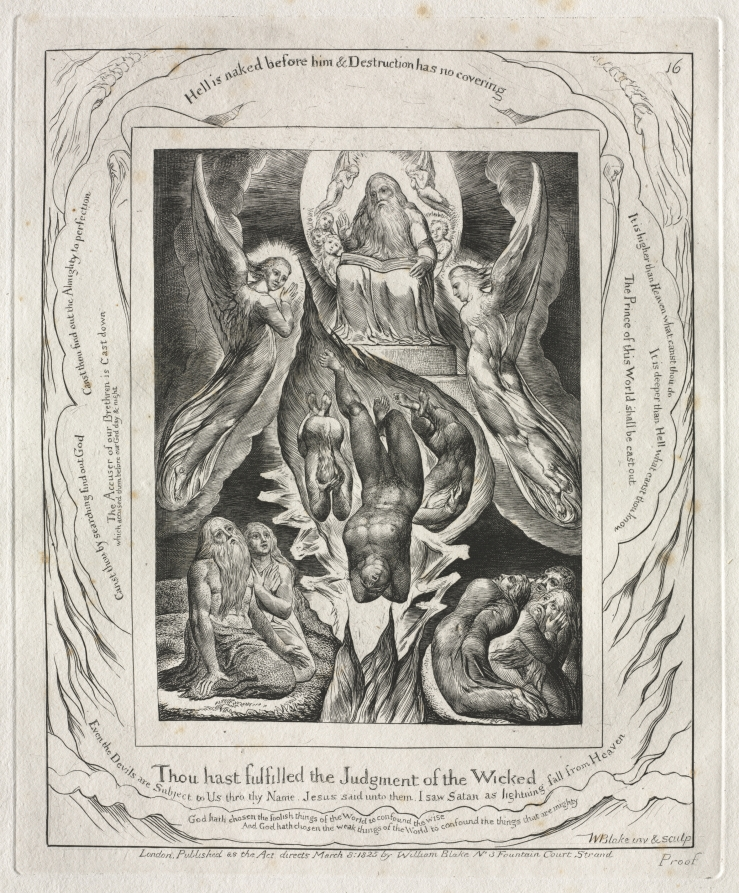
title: The Book of Job: Pl. 16, Thou hast fulfilled the Judgment of the Wicked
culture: England, 18th century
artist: William Blake (British, 1757–1827)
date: 1825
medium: engraving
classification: Portfolio